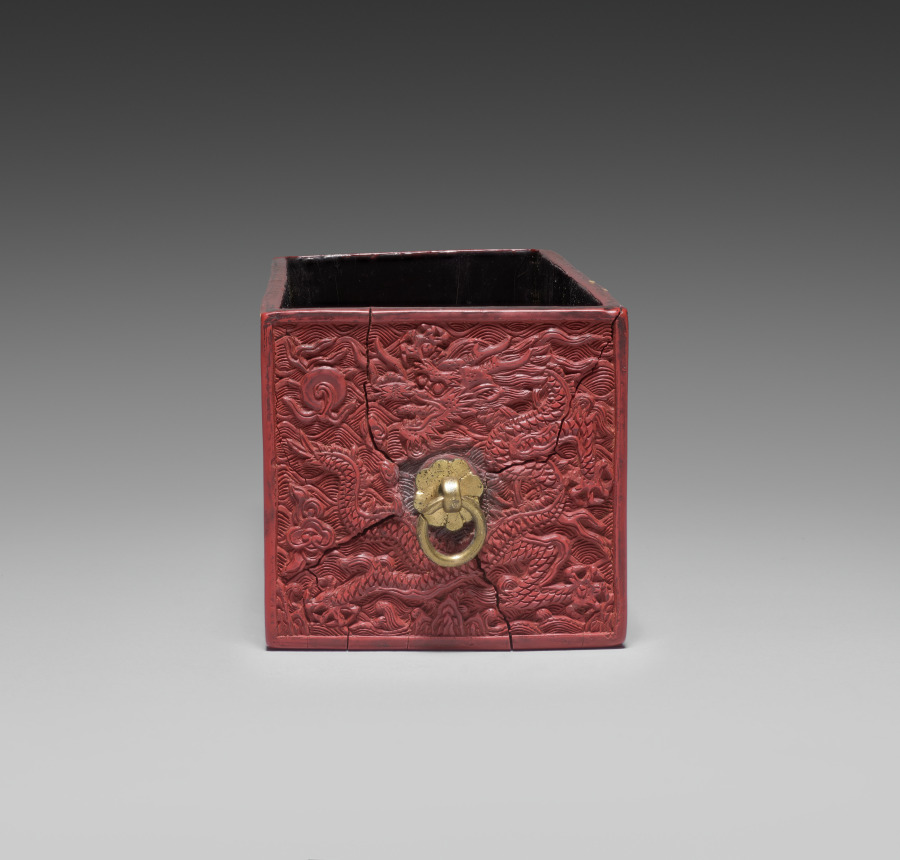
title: Drawer for a Tihong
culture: China, Ming dynasty (1368-1644), Wanli reign (1572-1620)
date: 1585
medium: carved cinnabar lacquer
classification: Lacquer